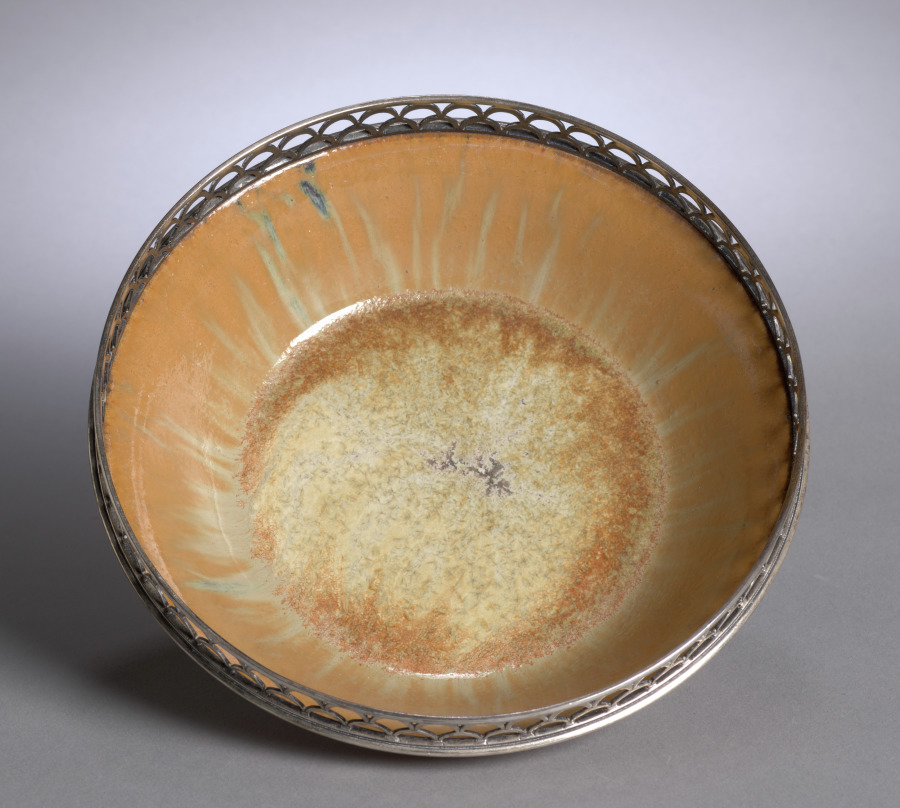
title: Bowl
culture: France, late 19th-early 20th Century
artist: Auguste Delaherche (French, 1857–1940)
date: c. 1899–1900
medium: stoneware with metal mounts, silvered and gilded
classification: Ceramic